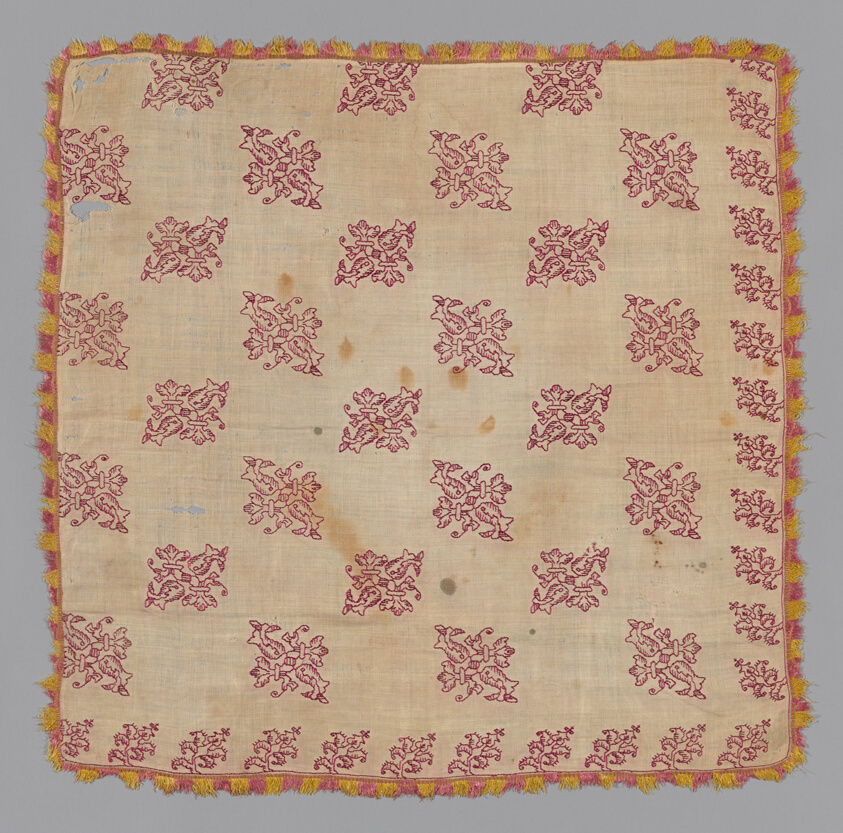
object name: Textile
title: Cover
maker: Italy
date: 17th century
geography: Italy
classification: textile; needlework (visual works)